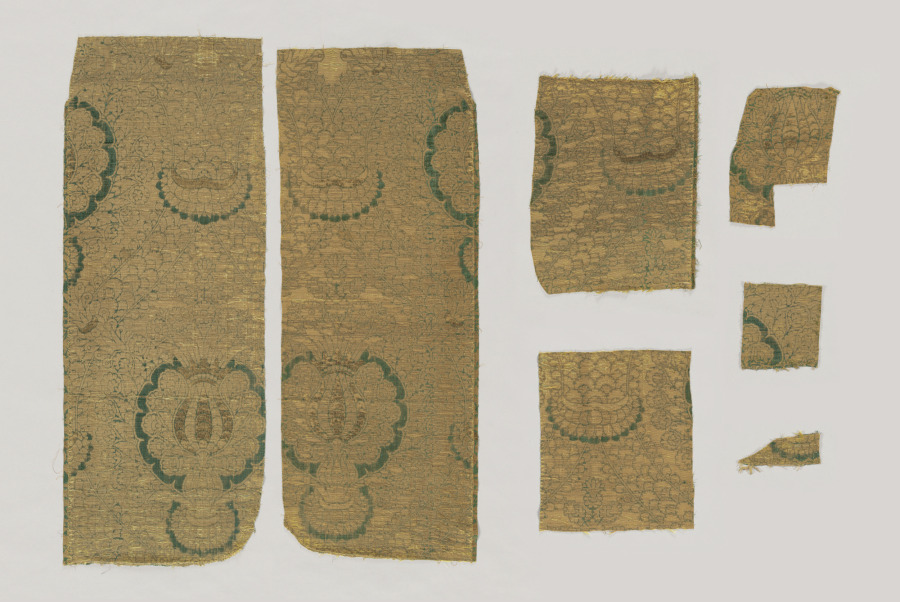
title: Velvet Fragments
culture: Spain, early 16th century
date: early 16th century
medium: velvet (cut, voided, and brocaded): silk and gold thread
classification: Velvet